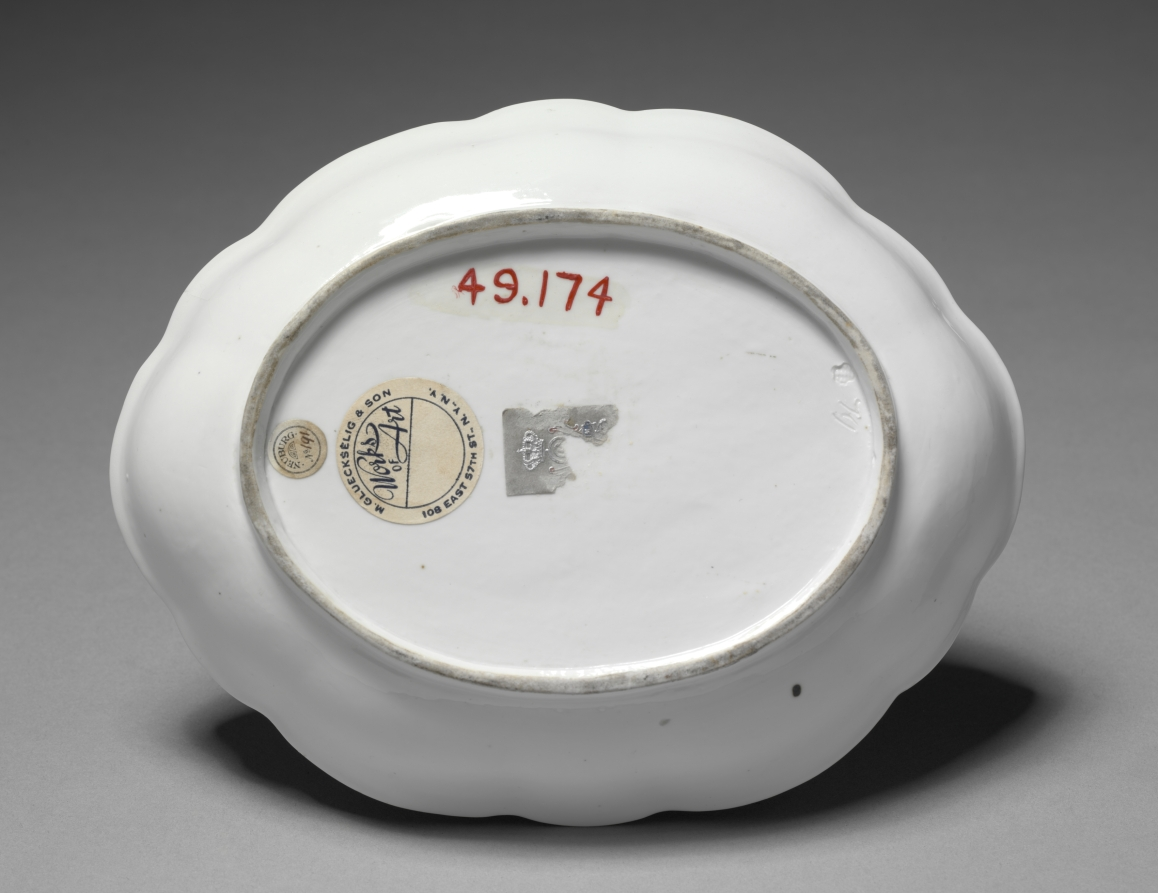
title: Oval Dish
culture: Germany, Nymphenburg, 18th century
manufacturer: Nymphenburg Porcelain Factory (German, founded 1747)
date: c. 1760–65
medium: porcelain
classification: Ceramic